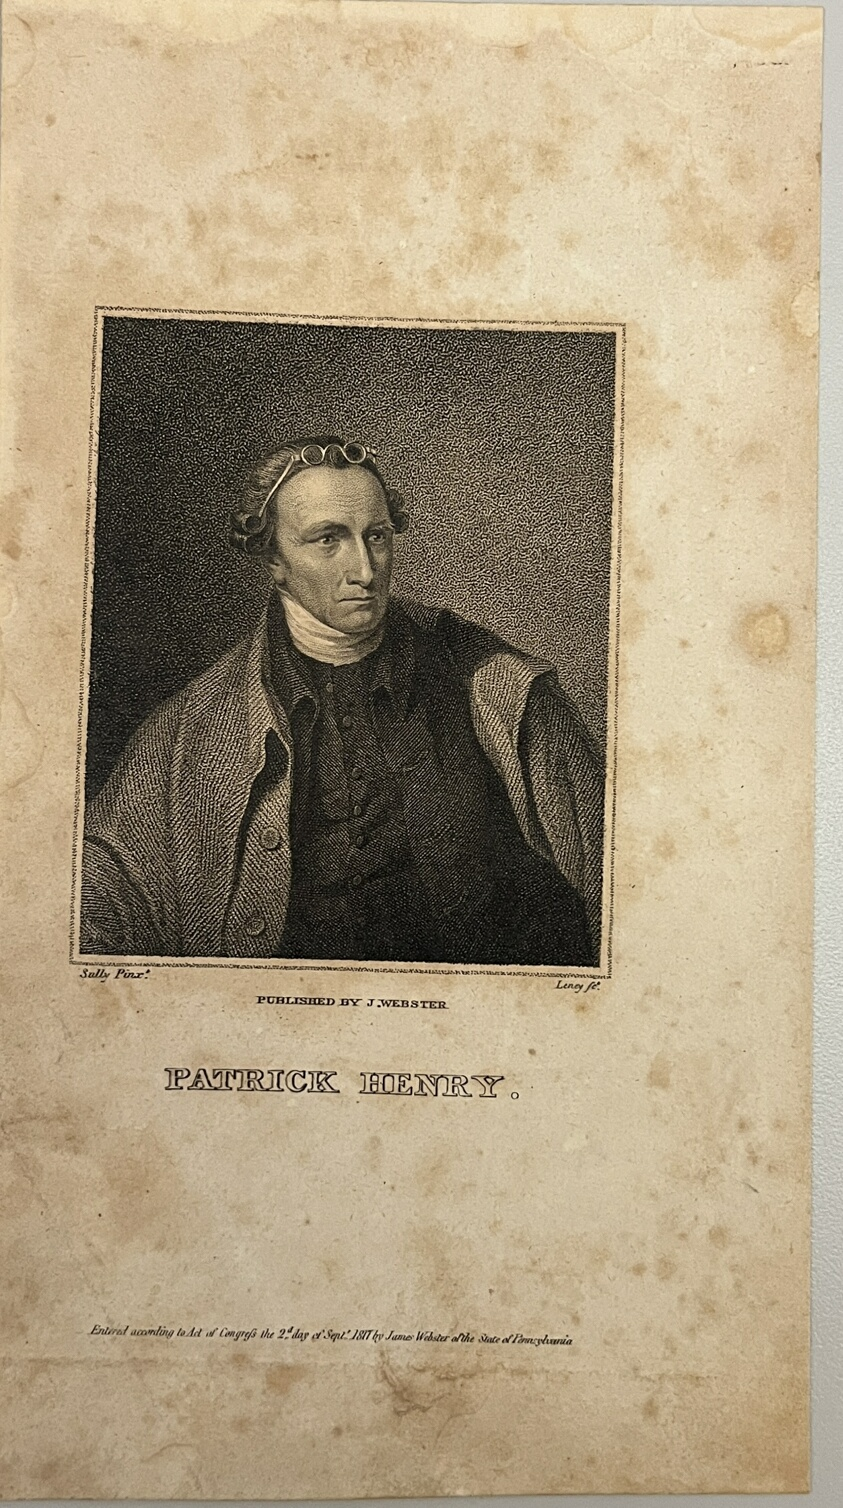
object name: Print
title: Patrick Henry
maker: Possibly William Satchwell Leney (English, active in America and Canada, 1769-1831); published by J. Webster (America, 19th century); after Thomas Sully (American, 1783-1872)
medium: Stipple etching on paper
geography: England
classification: reproduction; print; prints and drawing